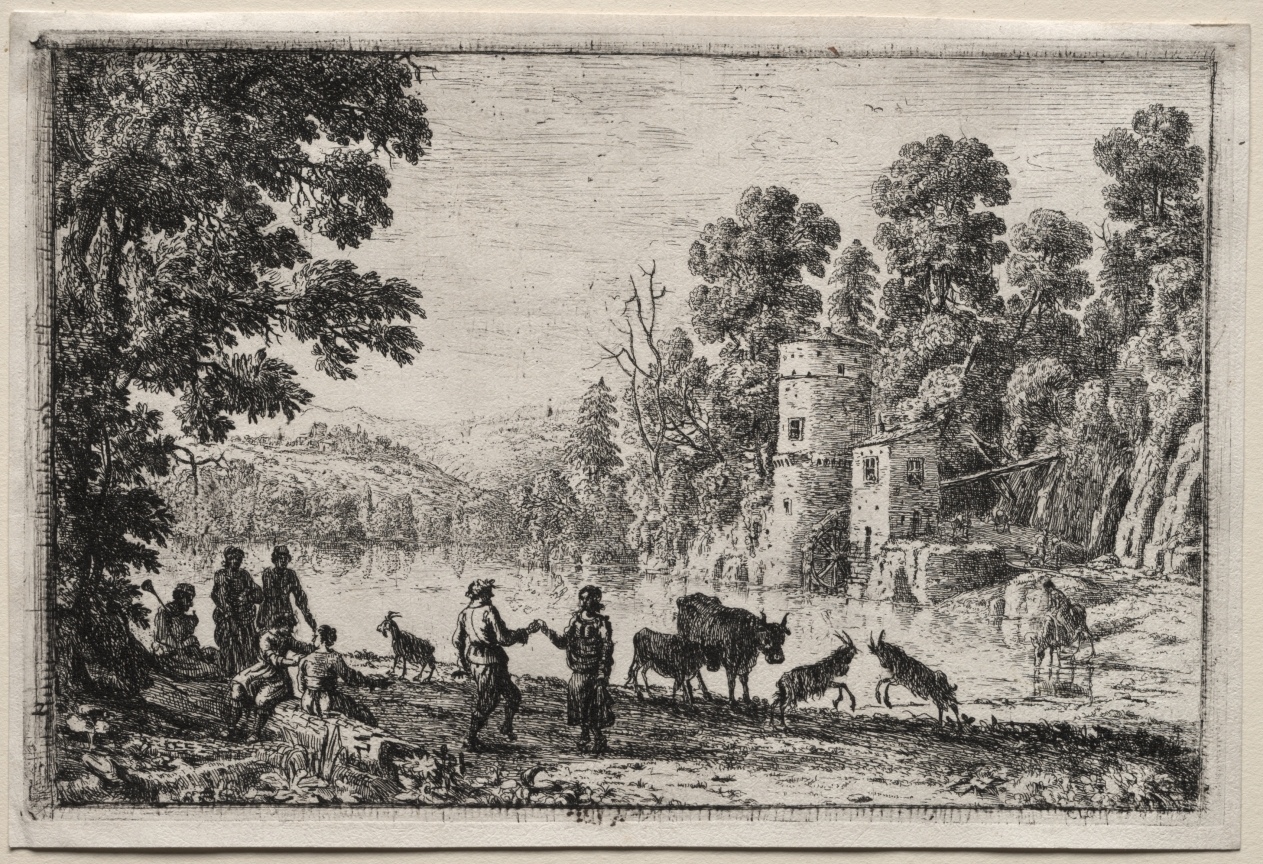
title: The Dance by the River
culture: France, 17th century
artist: Claude Lorrain (French, 1604–1682)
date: c. 1634–36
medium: etching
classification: Print